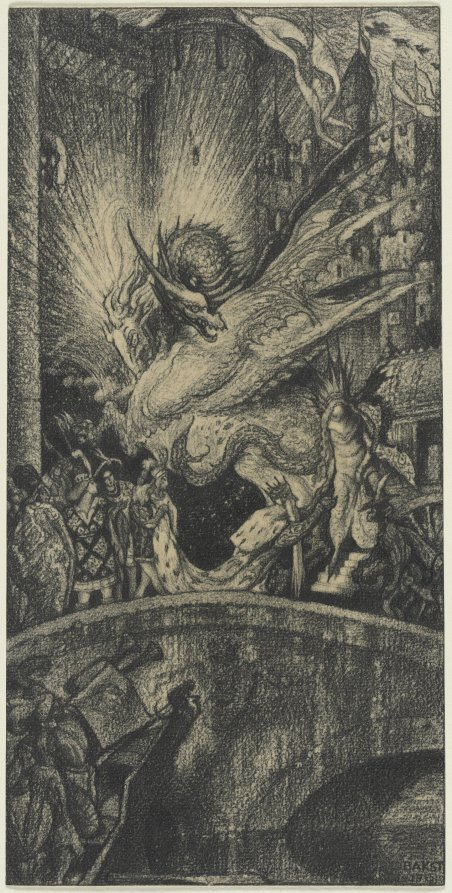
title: Study for The Sleeping Beauty: The Aged King Pleads with the Good Fairy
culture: Russia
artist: Léon Bakst (Russian, 1866–1924)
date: 1915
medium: pencil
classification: Drawing